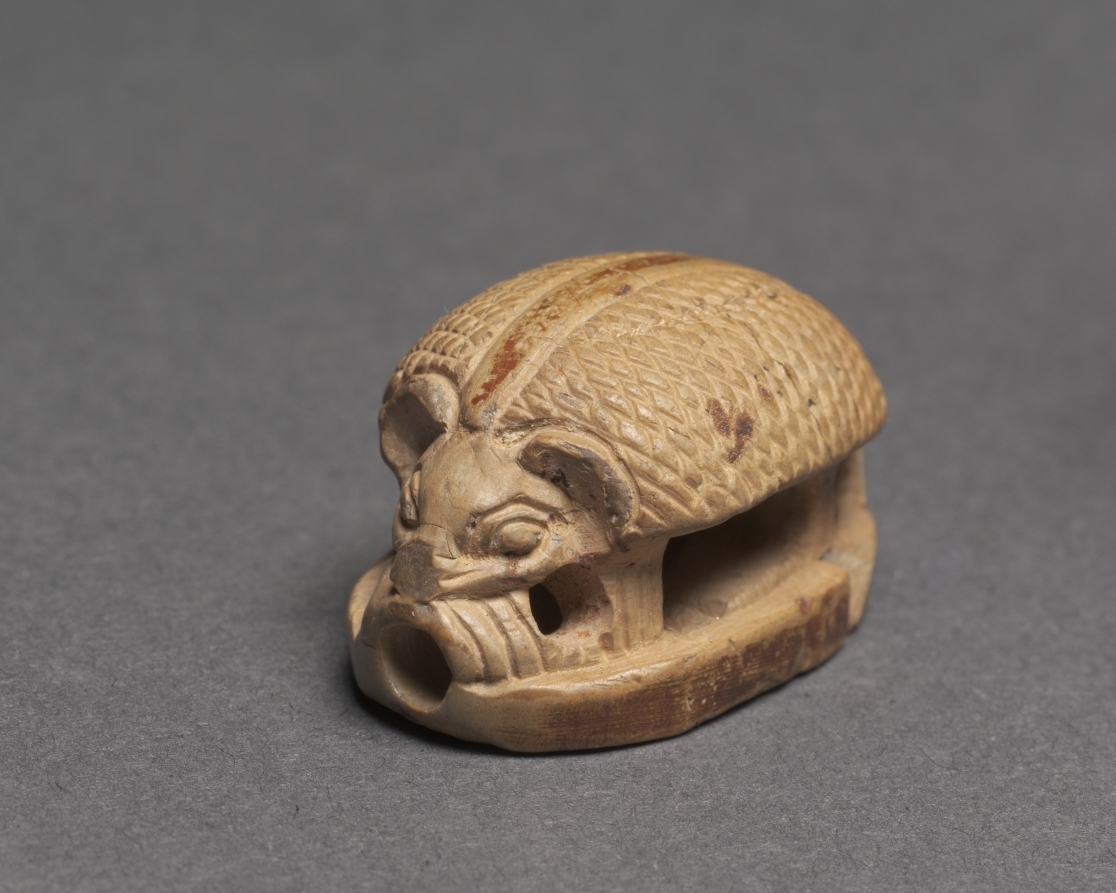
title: Hedgehog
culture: Egypt, New Kingdom (1540–1069 BCE), Dynasty 18, reign of Amenhotep III (1390–1352 BCE)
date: c. 1391–1353 BCE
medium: steatite, originally glazed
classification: Scarabs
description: This hedgehog (Paraechinus aethiopicus) stands in the round on an oval base, with openwork defining the legs. The carving is delicate and spirited. The face features large, round eyes; widely spaced, short ears; bulging cheeks; and a protruding snout. A tiny tail hangs at the rear. Crosshatching on the back represents the animal's spines. The design on the base begins at the head with a winged sun disk with pendant uraei. Below is a cluster of hieroglyphic signs, including an ankh-sign, a falcon with a sun disk, a hoe, and a maat-feather. A neb-sign fills the balance below. The significance of the hedgehog has multiple theories. As a hibernating animal, it may have associated with the powers of self-renewal and resurrection. Another lies in the animal's defensive strategy of inflating itself into a ball and projecting its spines, a posture of obvious apotropaic significance. Lastly, Egyptian folklore maintained that hedgehog amulets provided protection against snake bites, a belief grounded in the animal's natural resistance to poison.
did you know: Hedgehogs were common on amulets in the New Kingdom (1500s–1000s BC) and can also be seen on the backs of seals and scaraboids.